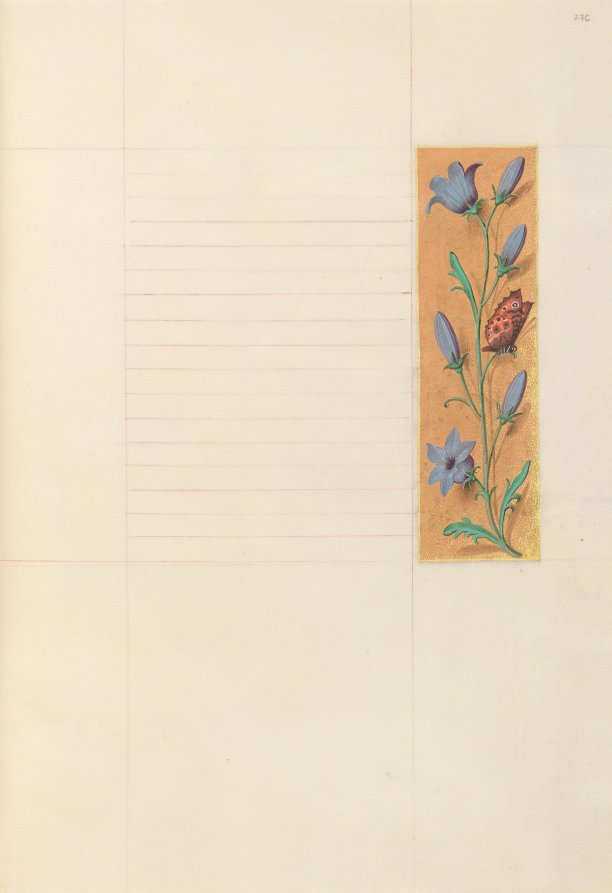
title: Hours of Queen Isabella the Catholic, Queen of Spain: Fol. 276r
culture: Flanders, Ghent and Bruges, late 15th century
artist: Master of the First Prayerbook of Maximillian (Flemish, c. 1444–1519)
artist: and Associates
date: c. 1500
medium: ink, tempera, and gold on vellum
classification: Bound Volume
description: This manuscript was illuminated by a circle of at least five highly organized manuscript painters active in the Flemish cities of Ghent and Bruges. The principal illuminator was Alexander Bening, who painted the majority of the book's miniatures. Manuscripts produced by this circle of artists are renowned for the decoration of their borders, which typically feature a rich variety of realistically-painted flowers, birds, and butterflies. This prayer book, called a book of hours, was intended not for a cleric, but for the private devotions of a lay person-in this case, Isabella the Catholic, Queen of Spain (1451-1504). Isabella's coat of arms embellishes the book's frontispiece. It is unlikely that the book was commissioned by the Queen herself; rather, she probably received it as a diplomatic gift from someone courting her patronage, perhaps Cardinal Francisco Jimenez de Cisneros. A Franciscan friar, Jimenez was dependent upon Isabella for his advancement, first to the post of Queen's confessor in 1492, and then to Archbishop of Toledo in 1495.